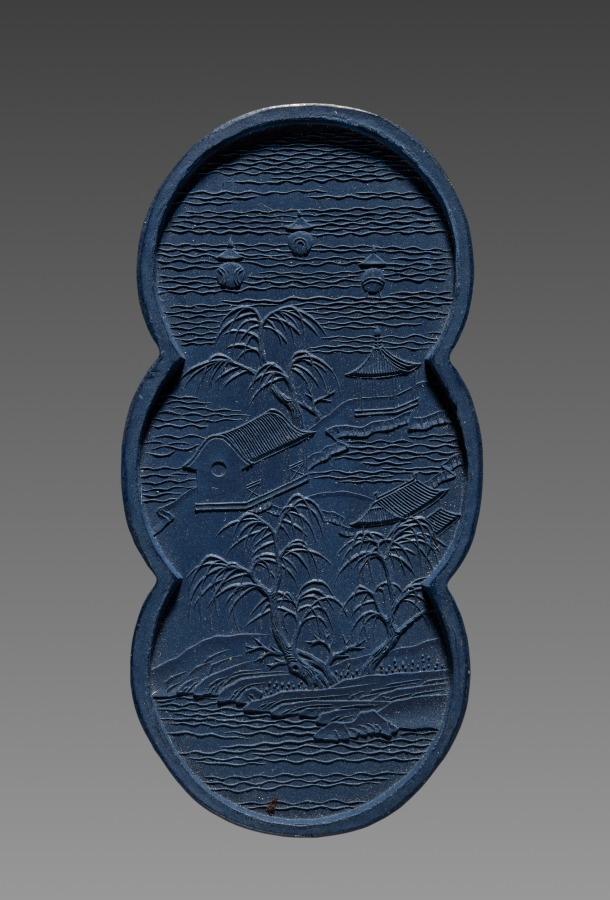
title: Ink Stick from an Imperially Commissioned Set of Ink Stick with Images and Poems of Famous West Lake Sites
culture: China, Qing dynasty (1644–1911), Qianlong reign (1736–95)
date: 1780–94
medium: Molded ink in blue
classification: Miscellaneous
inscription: 乾隆年製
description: This is one of ten ink cakes of different shapes and colors stored in an exquisite lacquer box. Each is inscribed in gold with a poem by the Qianlong emperor, praising the ten famous sights of the Westlake in Hangzhou, near Shanghai. The Westlake is famous for its natural beauty; it was a favorite imperial destination and remains a tourist attraction today. Ink cakes (also called ink sticks) are dissolved with the addition of water and ground on the surface of a flat stone into liquid ink for painting and calligraphy. The precious ink cakes here, however, have never been used.